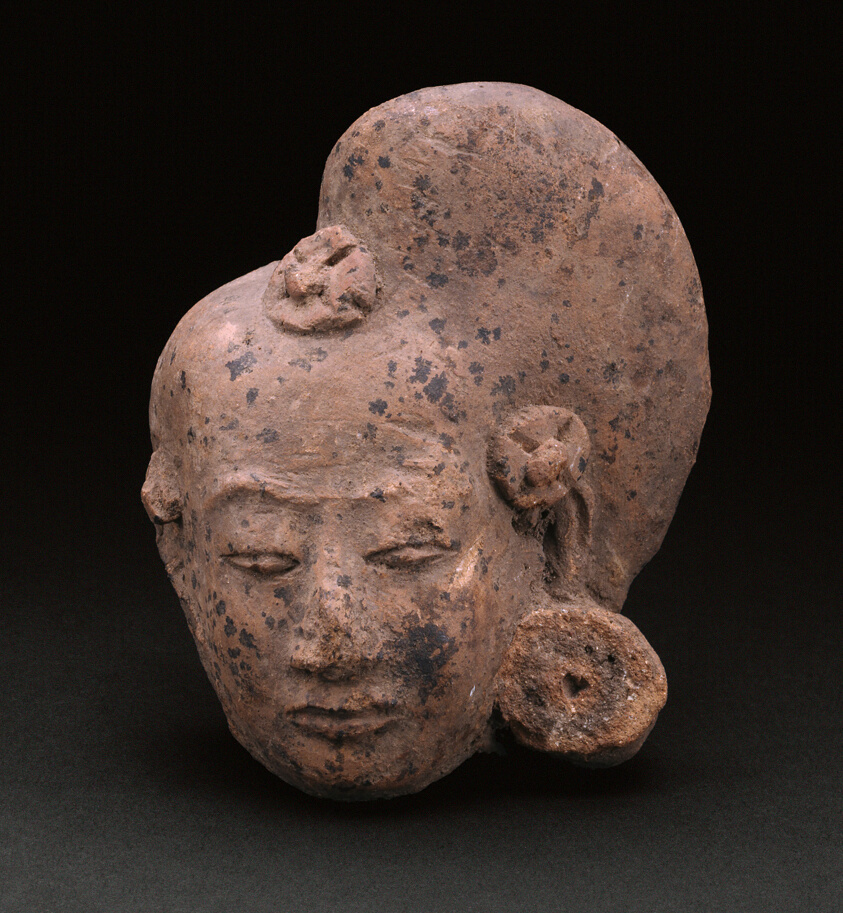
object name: Sculpture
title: Head from a Figurine of a Female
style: Southeast Asian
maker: Indonesia; Eastern Java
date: 14th/15th century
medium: Terracotta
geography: Eastern Java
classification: earthenware; ceramics; sculpture; asian art